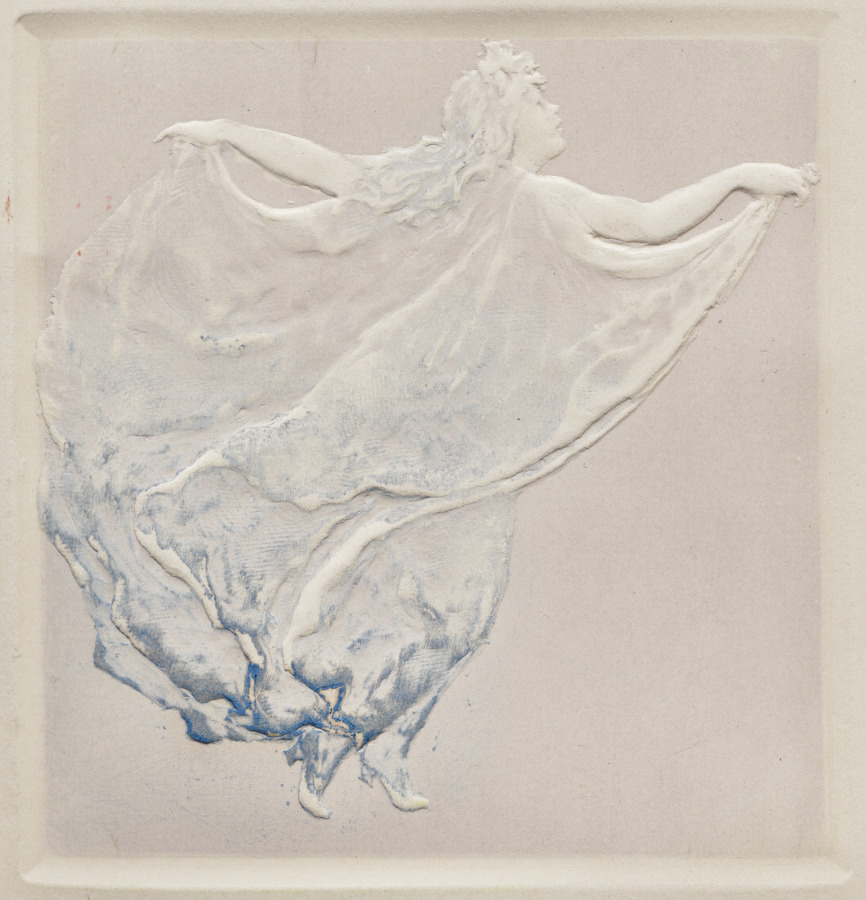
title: Dancing Woman with Arms Spread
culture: France, early 20th Century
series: La Loïe Fuller, by Roger Marx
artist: Pierre Roche (French, 1855–1922)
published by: Les Cents Bibliophiles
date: 1904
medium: gypsograph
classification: Bound Volume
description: Although best known as a sculptor, Roche was a versatile and prolific artist who worked in many mediums. Loïe Fuller, the pioneer of modern dance who took Paris by storm in 1892, was one of his favorite subjects. He portrayed her in clay, bronze, marble, plaster, and in a series of gypsographs that illustrated an essay by the art critic Roger Marx. The book was described as "a precious monument to Loïe Fuller."